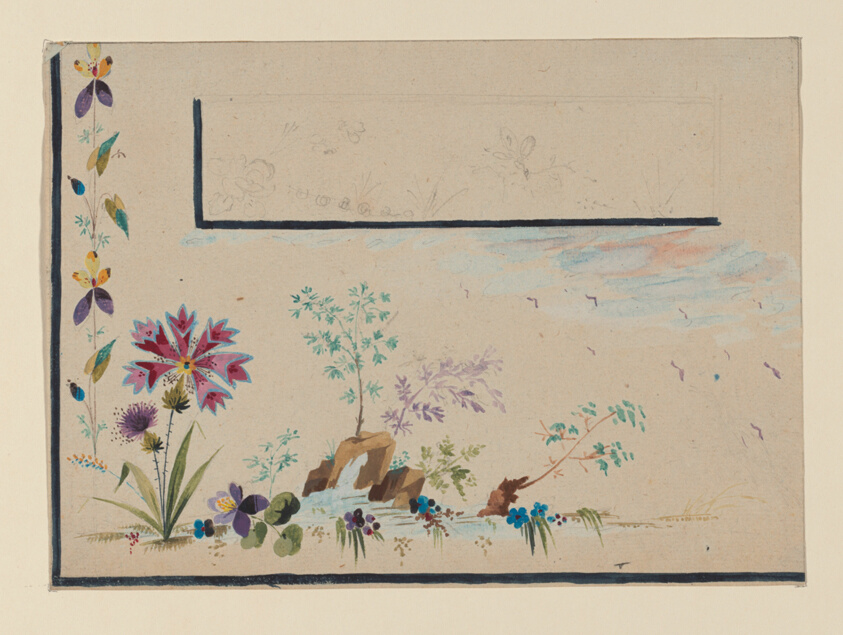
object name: Drawing and Watercolor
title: Design for a Waistcoat Pocket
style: 18th Century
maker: France, probably Lyon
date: 1770-1810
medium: Opaque watercolor and graphite on cream laid paper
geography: France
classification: textile; accessory - paper design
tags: flowers, foliage, rocks